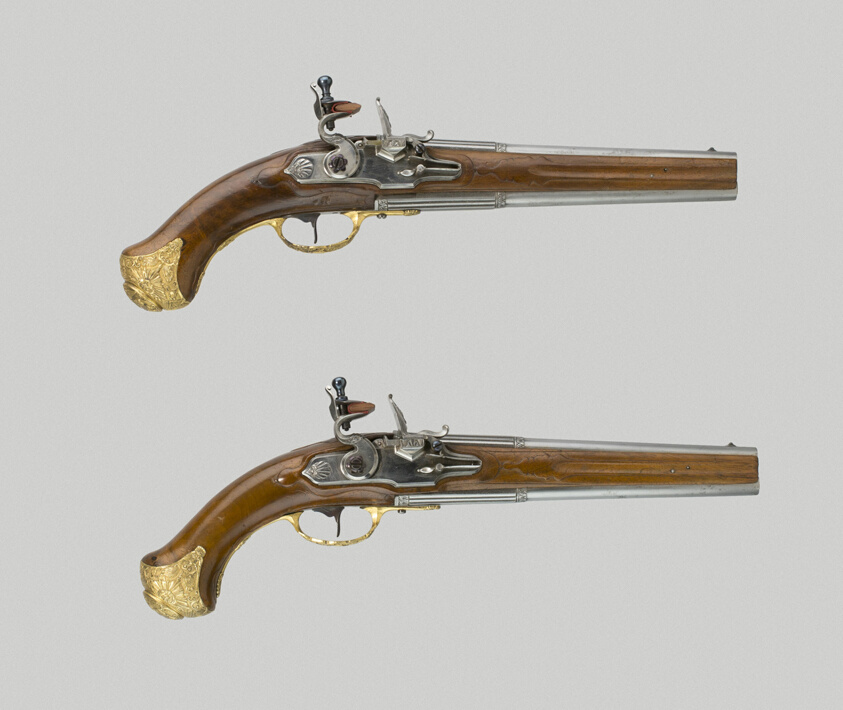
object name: Arms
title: Pair of Double-Barrel Flintlock Pistols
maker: German, Saxony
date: c. 1730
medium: Steel, gilt bronze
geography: Saxony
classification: firearm-handgun; arms; arms and armor